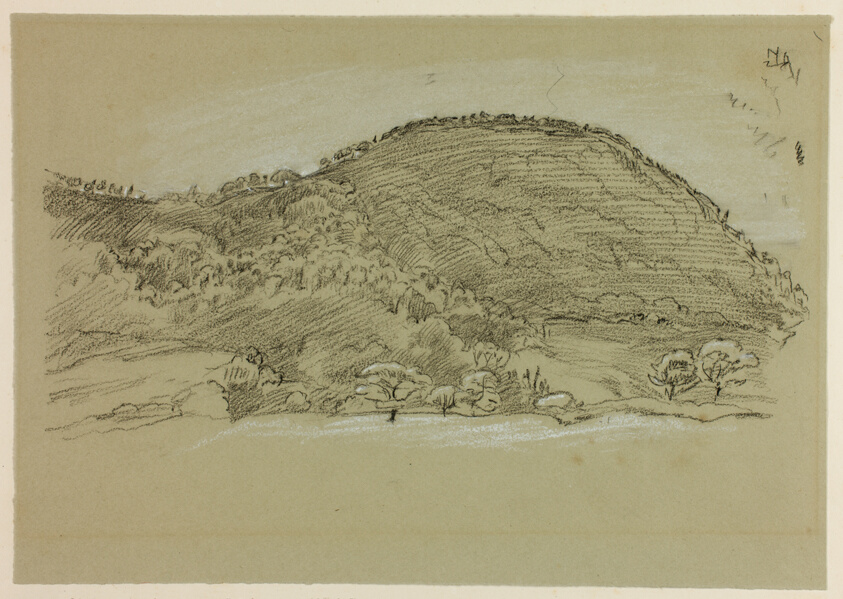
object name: Drawing and Watercolor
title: Walking Through the Fields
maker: John Linnell (English, 1792-1882)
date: July 25, 1868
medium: Black chalk, heightened with white chalk, on green-gray wove paper, tipped onto cream wove paper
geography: England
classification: chalk; drawings (visual works); prints and drawing